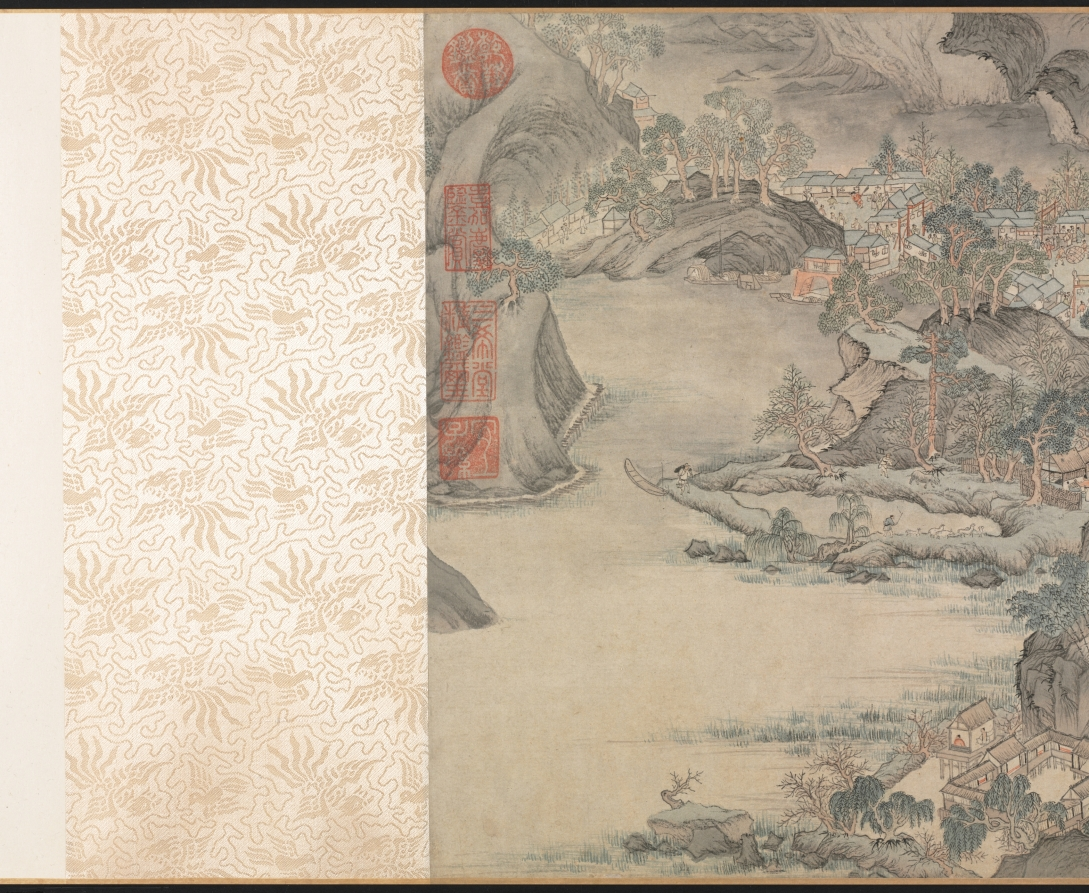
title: Greeting the Spring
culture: China, Ming dynasty (1368–1644)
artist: Wu Bin (Chinese, active c. 1591–1626)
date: 1600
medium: handscroll; ink and light color on paper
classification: Painting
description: This masterfully composed landscape in light colors and delicate brushwork is an image of the water-rich Jiangnan region in southeast China, where Wu Bin was active as an artist. Embedded in rolling hills along lakesides and streams nestle cityscapes hosting numerous spring festivities. Lantern displays and street performances in the villages salute the New Year, and are interwoven with scenes of farming, fishing, and silk making. In one scene in the middle ground, an ox made of clay under a canopy is lead in a procession to an architectural compound, a ceremony known as whipping the spring ox in hope for a good harvest. This handscroll bears five collector seals by the Qianlong emperor indicating his appreciation for the painting.